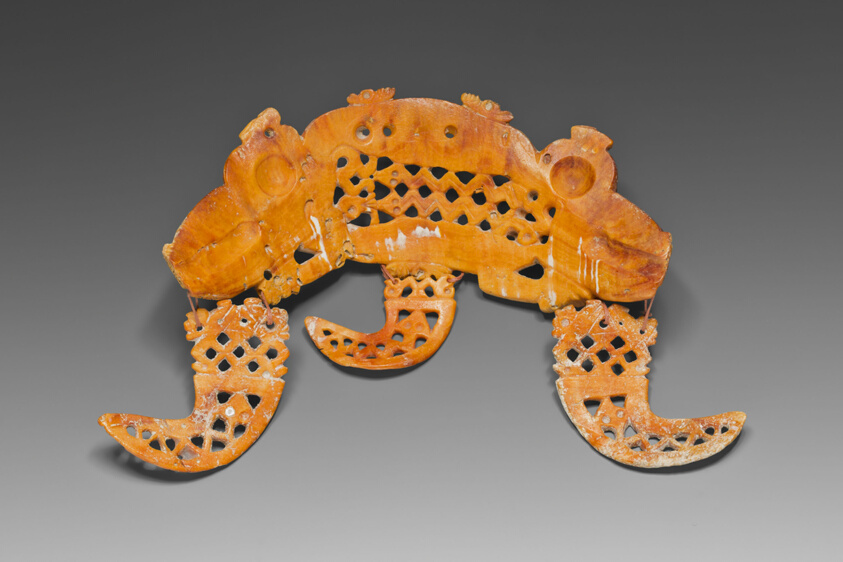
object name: Costume and Accessories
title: Pendant in the Form of a Mythical Double-Headed Creature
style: colima, mesoamerican, Pre-Columbian, americas, jalisco, west mexico, Arts of the Americas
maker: Colima or Jalisco; Colima or Jalisco, Mexico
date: 200 BCE–200 CE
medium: Spondylus shell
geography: Western Mexico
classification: pendant (jewelry); shell; art of the americas; jewelry; costume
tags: jewelry, supernatural, water, shells